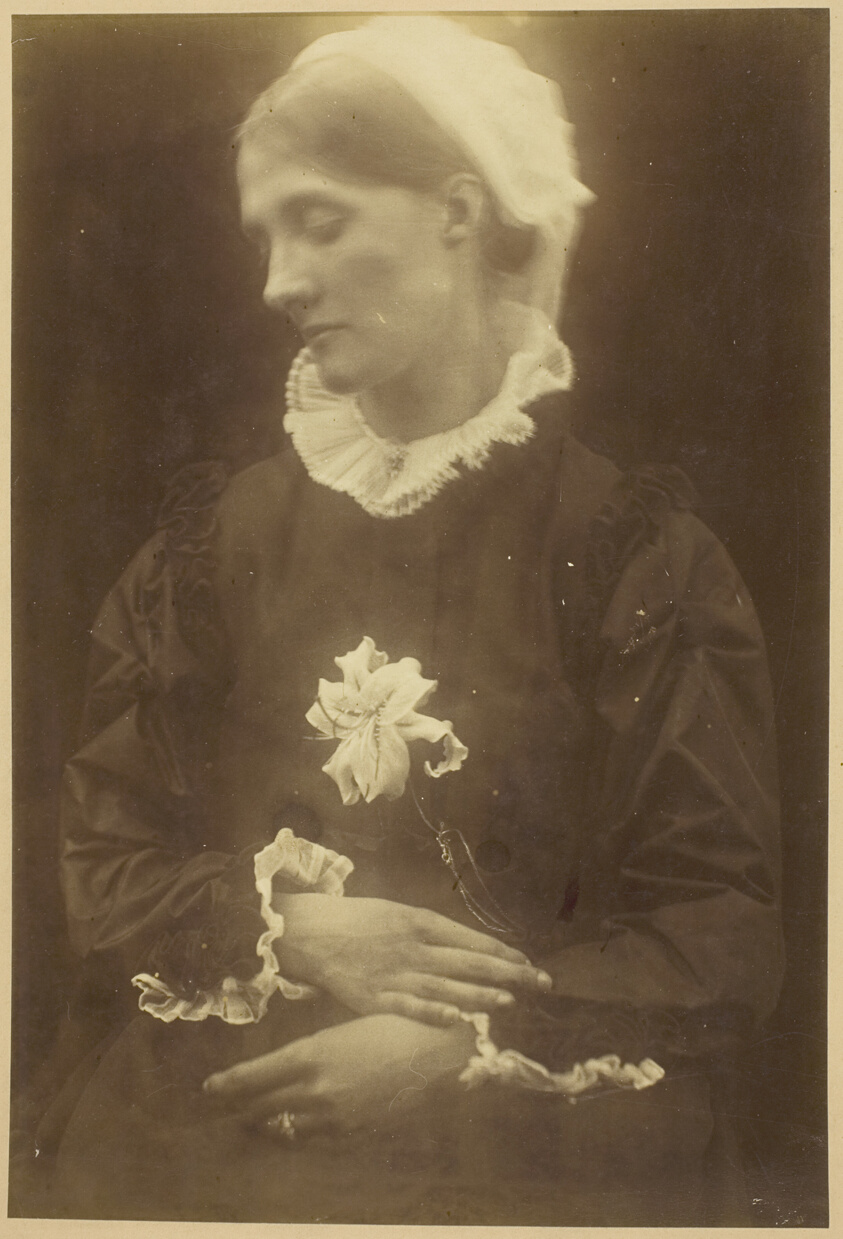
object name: Photograph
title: Mrs. Herbert Duckworth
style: 19th century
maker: Julia Margaret Cameron (English, 1815–1879)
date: c. 1874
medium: Albumen print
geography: England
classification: albumen silver print; photographic process; photography; photograph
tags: portraits, portraits: female subject, photography